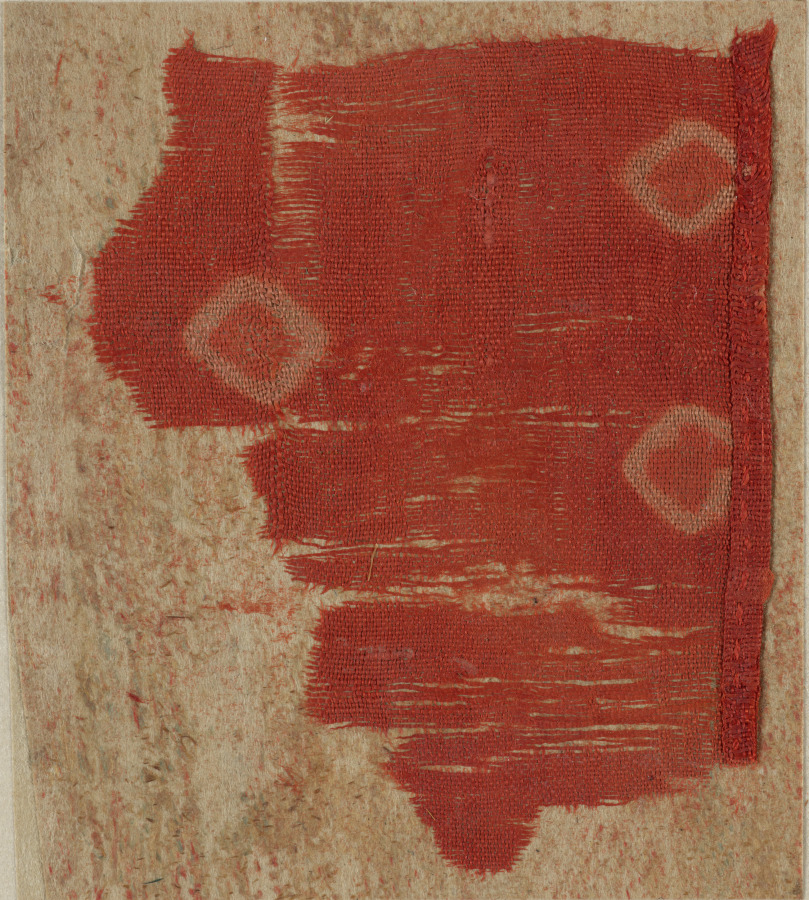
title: Fragment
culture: China or Japan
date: 700s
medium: tabby weave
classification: Textile